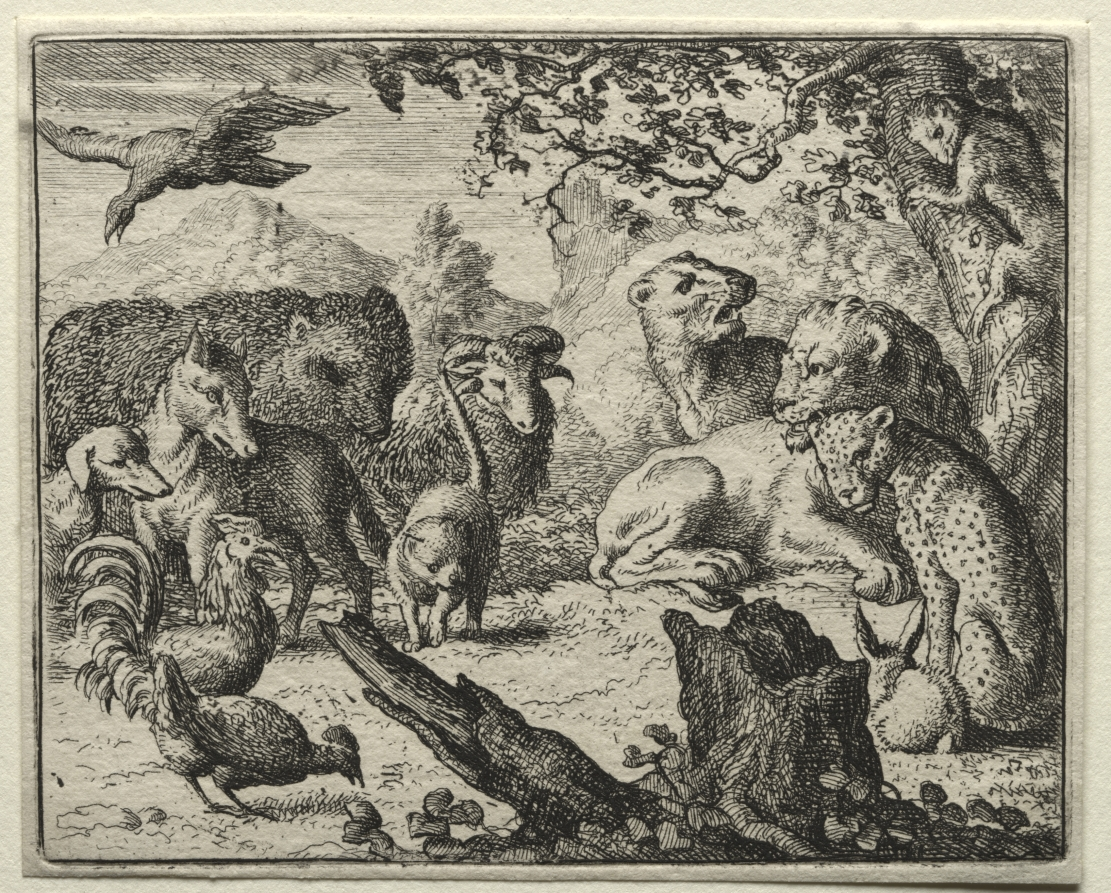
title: Reynard the Fox: The Lion's Court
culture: Netherlands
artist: Allart van Everdingen (Dutch, 1621–1675)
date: 1650–75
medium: etching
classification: Print